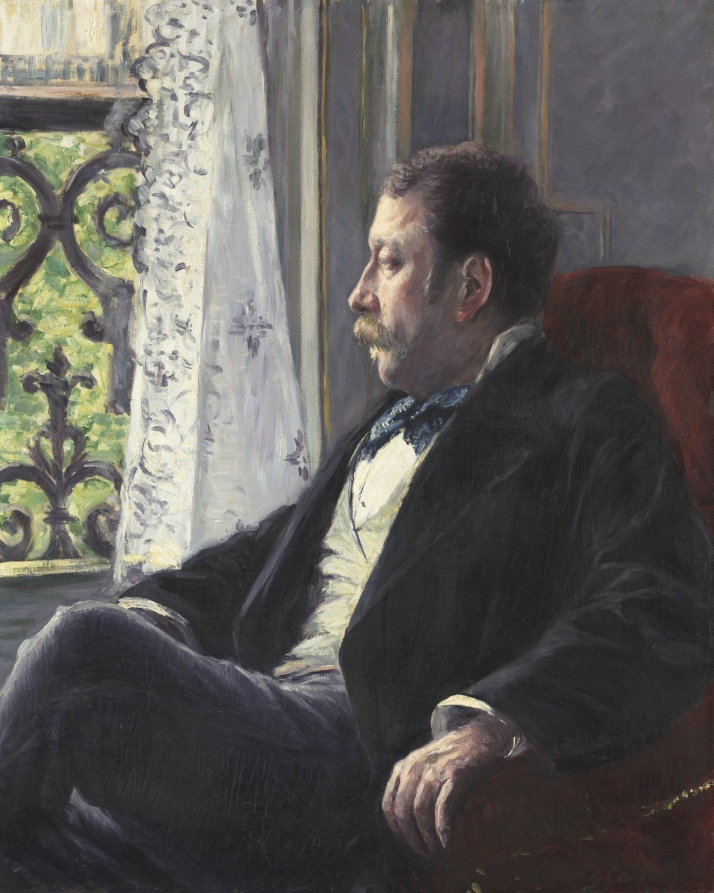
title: Portrait of a Man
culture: France, 19th century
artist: Gustave Caillebotte (French, 1848–1894)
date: 1880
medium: oil on canvas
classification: Painting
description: This portrait of Albert Courtier was painted in the fourth-floor apartment at 31 boulevard Hausmann in Paris that Gustave Caillebotte shared with his brother Martial. The interior and balcony of this apartment provided the setting for numerous paintings of men in Caillebotte’s social circle surveying the city. Courtier’s pose and unguarded gaze suggest a comfortable rapport with the artist. Their relationship was close: Courtier posed for Caillebotte on several occasions, owned four of the artist’s paintings, and designated his friend as godfather to his eldest daughter.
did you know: The subject of this portrait is Albert Courtier, Gustave Caillebotte's notary as well as a lifelong family friend.